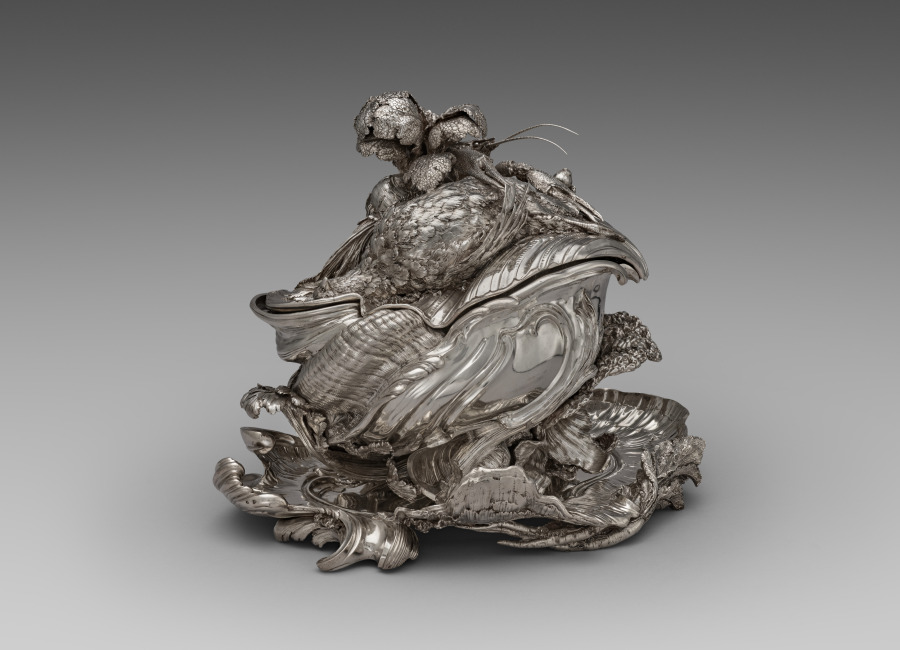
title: Covered Tureen on Stand (Pot-à-oille)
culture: France, Paris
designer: Juste-Aurèle Meissonnier (French, 1695–1750)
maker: Pierre-François Bonnestrenne (French)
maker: Henry Adnet (French, 1745)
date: 1735–38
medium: silver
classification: Silver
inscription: [Maker’s mark of Pierre−François Bonnestrenne, beneath platter; inside tureen (two marks)]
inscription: [Warden's mark for Paris, 1734−1735, beneath platter; inside tureen; inside cover]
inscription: [Charge mark of Hubert Louvet, Paris, 1732-1738, on platter border; beneath platter; beneath tureen; inside cover; inside tureen (two marks)]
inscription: [Discharge mark of Louis Robin mostly used for stamping small work, Paris 1738−1744, on platter border; beneath tureen]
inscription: [Warden's mark for Paris, 1736−1737, on platter border]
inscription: [Possibly British import mark, London, 1925, on platter border]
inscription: [Possibly mark of the British firm Charles & Richard Comyns, on platter border]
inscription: [Discharge of Louis Robin mostly used for stamping gold and silver between 1738 and 1744, beneath tureen; outside cover]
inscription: [Maker’s mark of Henry-Guillaume Adnet, inside cover]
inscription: [Two small undefined marks, inside cover]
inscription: [Under the surface of the platter the engraved signature]: “FAIT-PAR-I-A-MEISSONIER-ARCHITECTTE”; [and the weight] “673=5"; “No. [v] I 50 £ b76Sol”; [and the numbers] “A nº 1”; “A nº2”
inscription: [On tureen lip]: "MEISSONIER"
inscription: [On tureen lip]: “A nº 3”; “A nº2” [in order to place the tureen correctly on the stand]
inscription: [Numbers engraved on the stand, the tureen, and the cover to show how the piece should be assembled]: “A nº 1” [on the base of the tureen; beneath the cover; on the platter], “A nº 2” [on the platter], “A nº 3” [on the exterior rim of the tureen], “A nº4”; “A nº 5” [outside the cover], “A nº 7” [on the border of the platter]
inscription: [Two warden's marks for Paris, 1735-1736, beneath tureen]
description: This tureen exemplifies the French Rococo style, an artistic movement celebrating naturalistic forms that developed in Paris during the early 1700s. In contrast to classical, controlled symmetry, Rococo forms morph, twist, and spill into the space around them. Meissonnier embellished this tureen in a picturesque arrangement of vegetables and creatures, transforming a utilitarian object into a decadent display of wealth and abundance. This masterpiece comes from a set of two tureens commissioned by the English Duke of Kingston during an extended stay in Paris in the 1730s.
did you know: The langoustine, pigeon, and vegetables were cast using real examples giving the silver copies lifelike detail and appearance.